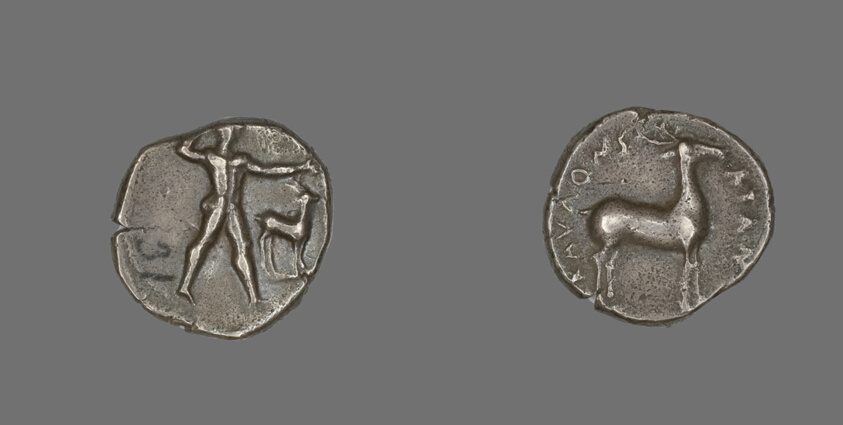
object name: Coin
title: Stater (Coin) Depicting Caulos and Deer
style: greek, ancient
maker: Greek; Caulonia, Italy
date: 480-388 BCE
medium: Silver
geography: Caulonia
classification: coin; ancient art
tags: deers, gods (deities)